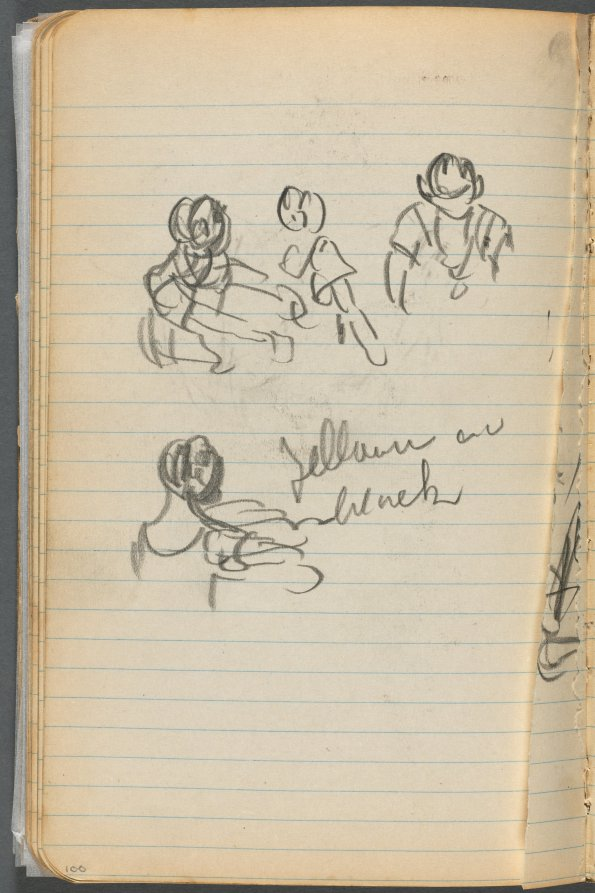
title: Sketchbook, page 100: Figures with Notes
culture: America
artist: Maurice Prendergast (American, born Newfoundland [now Canada], 1858–1924)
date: 1905–10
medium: graphite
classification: Bound Volume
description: This sketchbook contains 69 pages of drawings, a diary largely devoted to the state of the artist's health, and a three-page discourse on the nature of genius and ideas.